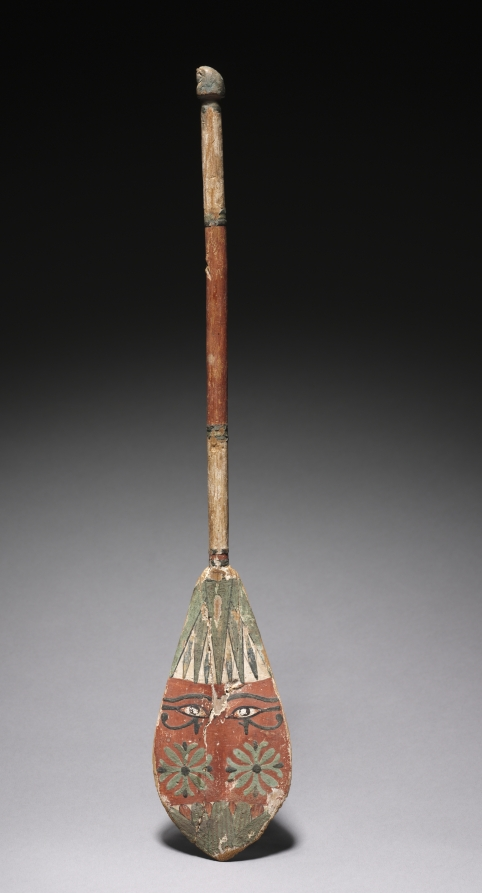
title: Model Steering Oar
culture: Egypt, Middle Kingdom (2040–1648 BCE)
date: 2040–1648 BCE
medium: painted tamarisk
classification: Funerary Equipment